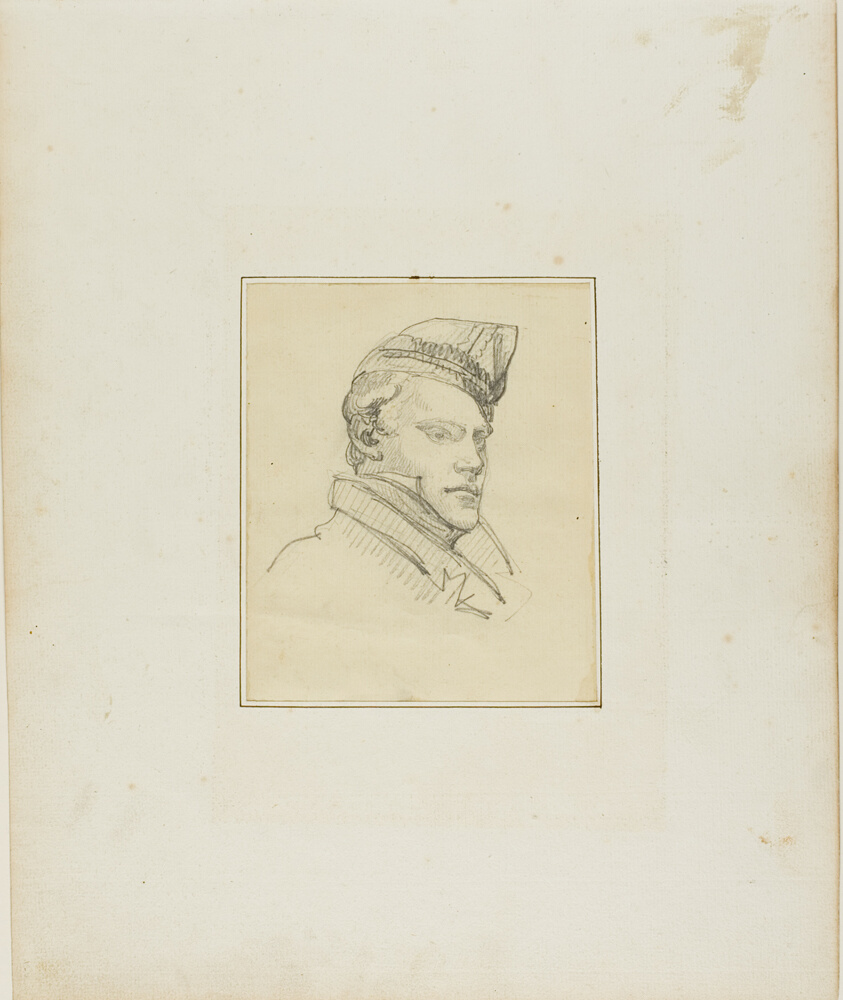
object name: Drawing and Watercolor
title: Portrait of a Young Man Wearing a Military Cap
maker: Jean Louis André Théodore Géricault (French, 1791-1824)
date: 1818/19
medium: Graphite, on cream wove paper, perimeter mounted on ivory laid paper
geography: France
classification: graphite; drawings (visual works); prints and drawing